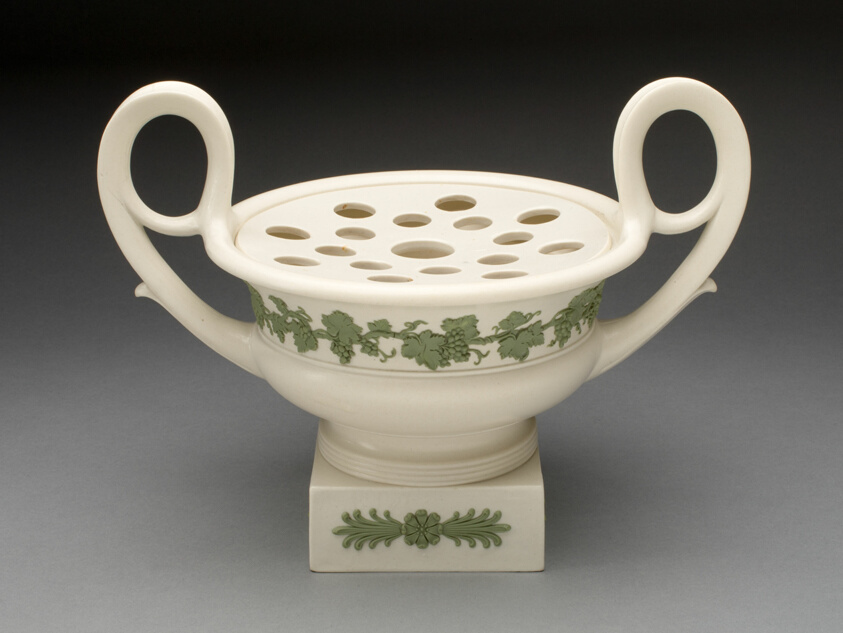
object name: Ceramics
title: Crocus Pot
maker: Wedgwood Manufactory (England, founded 1759)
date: c. 1820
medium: Stoneware: glazed ivory jasperware with green relief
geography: Burslem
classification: ornamental piece; stoneware; european decorative arts; ceramics